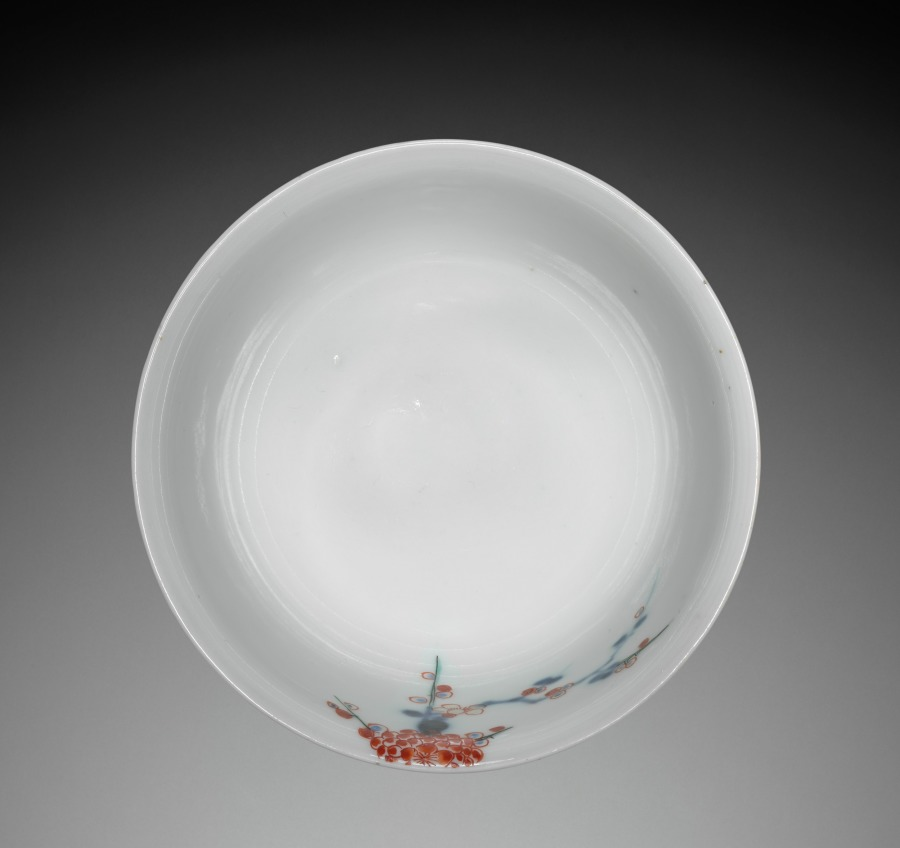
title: Cup with Plum and Rock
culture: Japan, Edo period (1615–1868)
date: 1700s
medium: porcelain with underglaze blue and overglaze enamel decoration (Hizen ware, Ko-Kutani type)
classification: Ceramic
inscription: 福